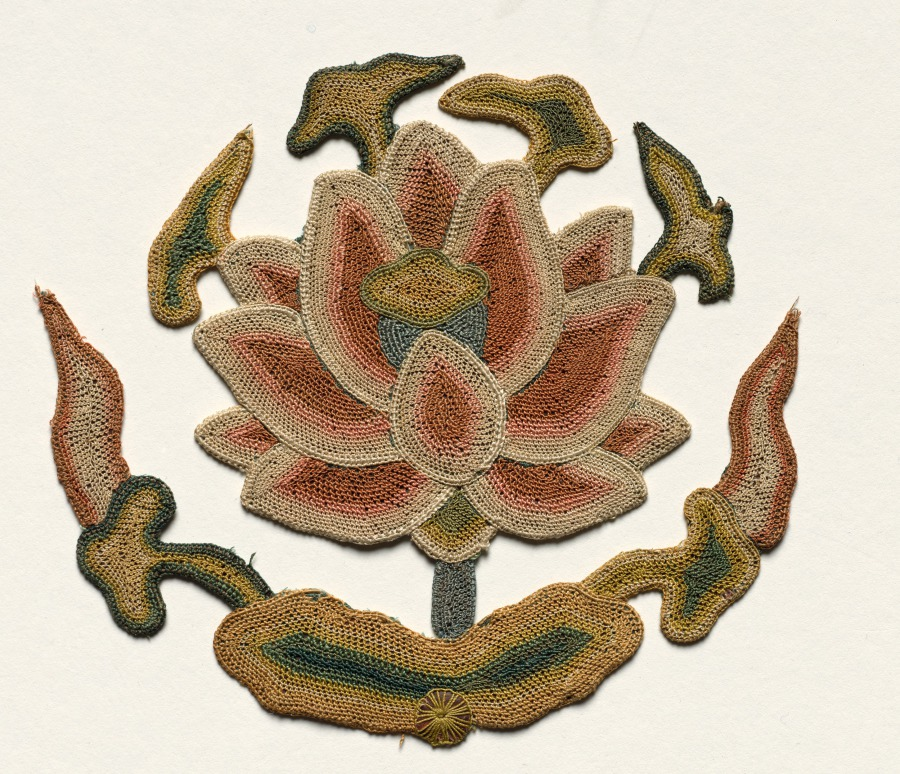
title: Fragment with Buddhist Jar supported by a Lotus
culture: China, 14th century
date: 1300s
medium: embroidery, needlelooping; silk and gold thread, silvered and gilded paper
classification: Embroidery